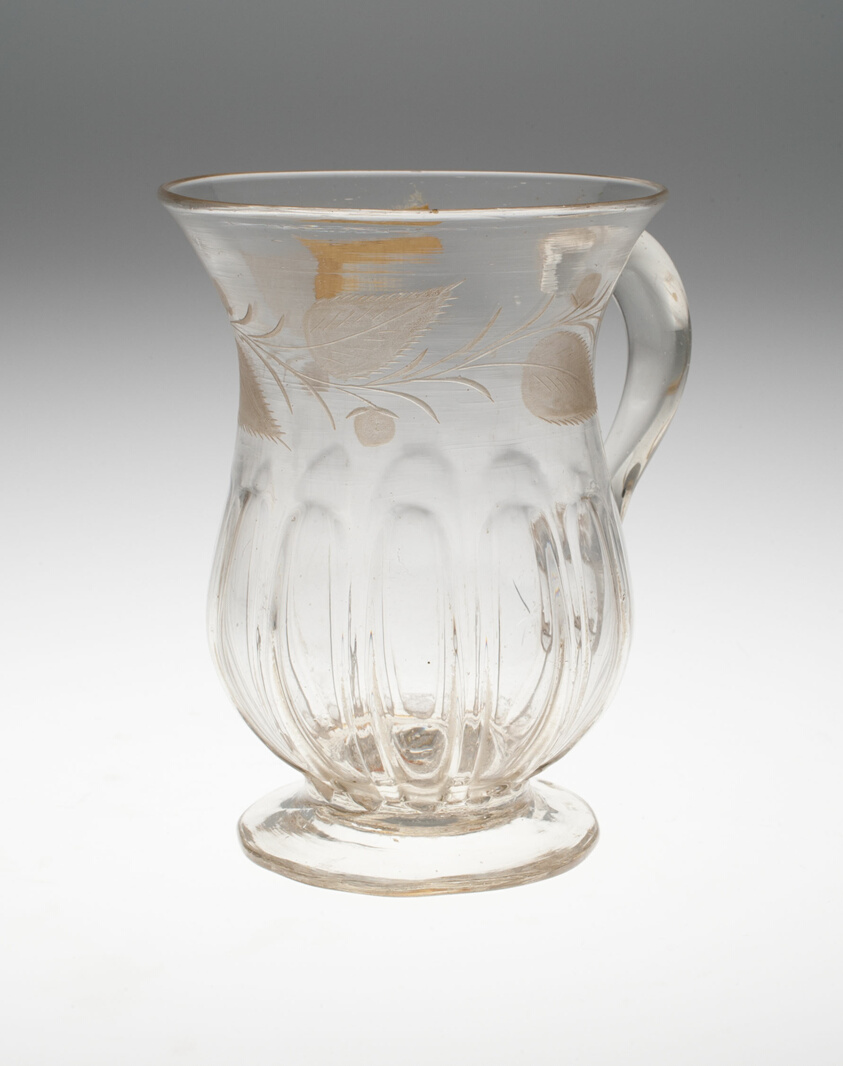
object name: Glass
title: Jug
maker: Spain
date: c. 1771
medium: Glass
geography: Spain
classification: glass; european decorative arts